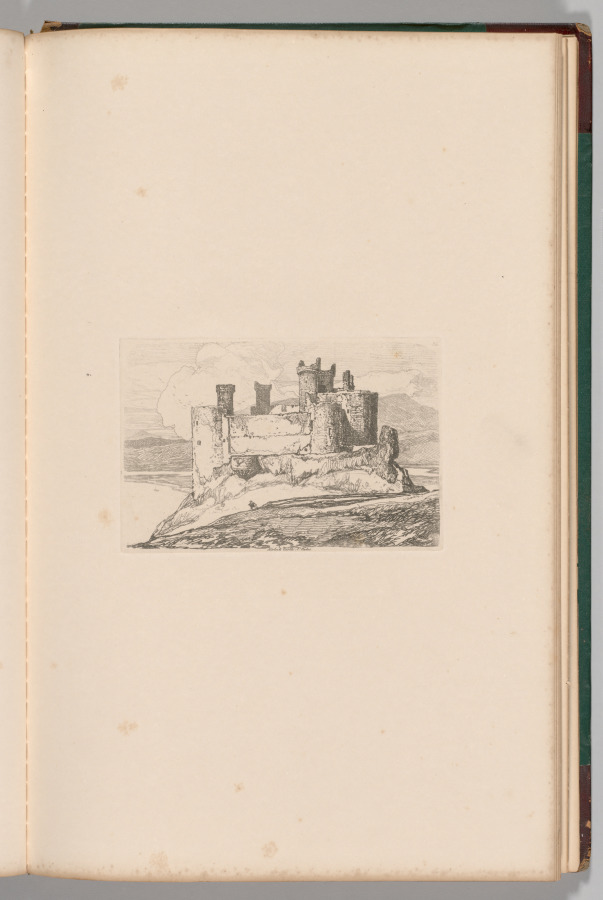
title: Liber Studiorum: Plate 25, Harlech Castle, N. Wales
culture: England, 19th century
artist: John Sell Cotman (British, 1782–1842)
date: 1838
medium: softground etching, from a bound volume containing 48 plates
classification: Bound Volume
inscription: In plate, within image, upper right: 25; in plate, below image: Harlech Castle, N. Wales